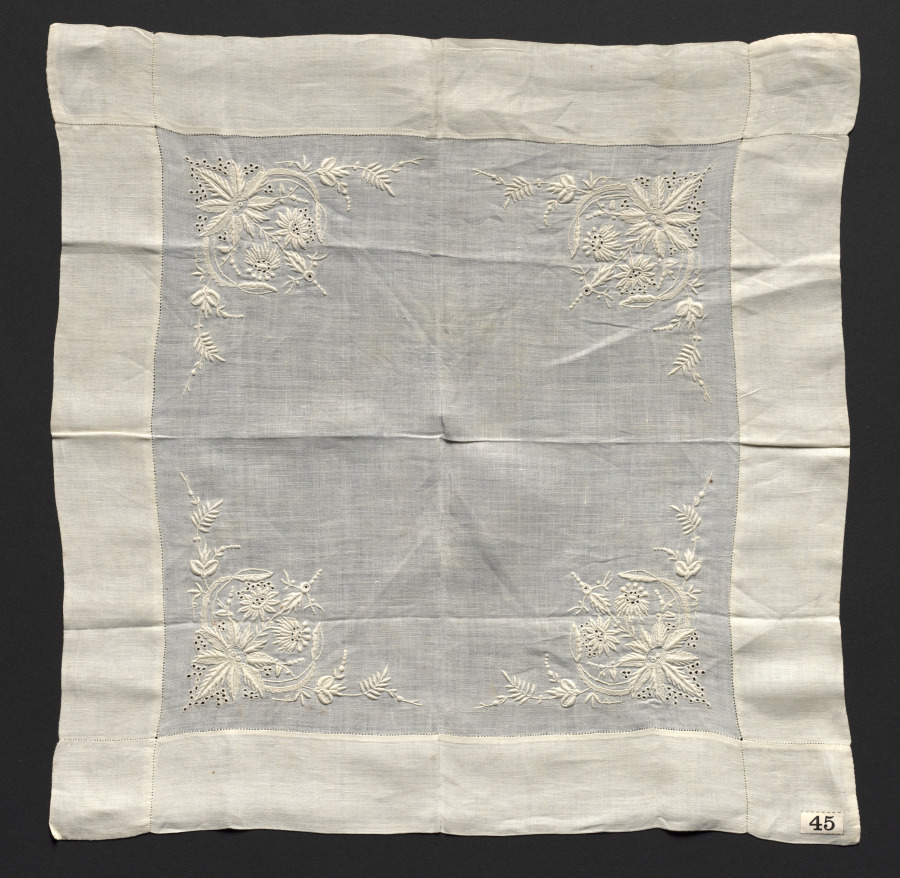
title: Handkerchief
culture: England or United States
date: 1880–99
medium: Plain weave linen, embroidered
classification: Embroidery